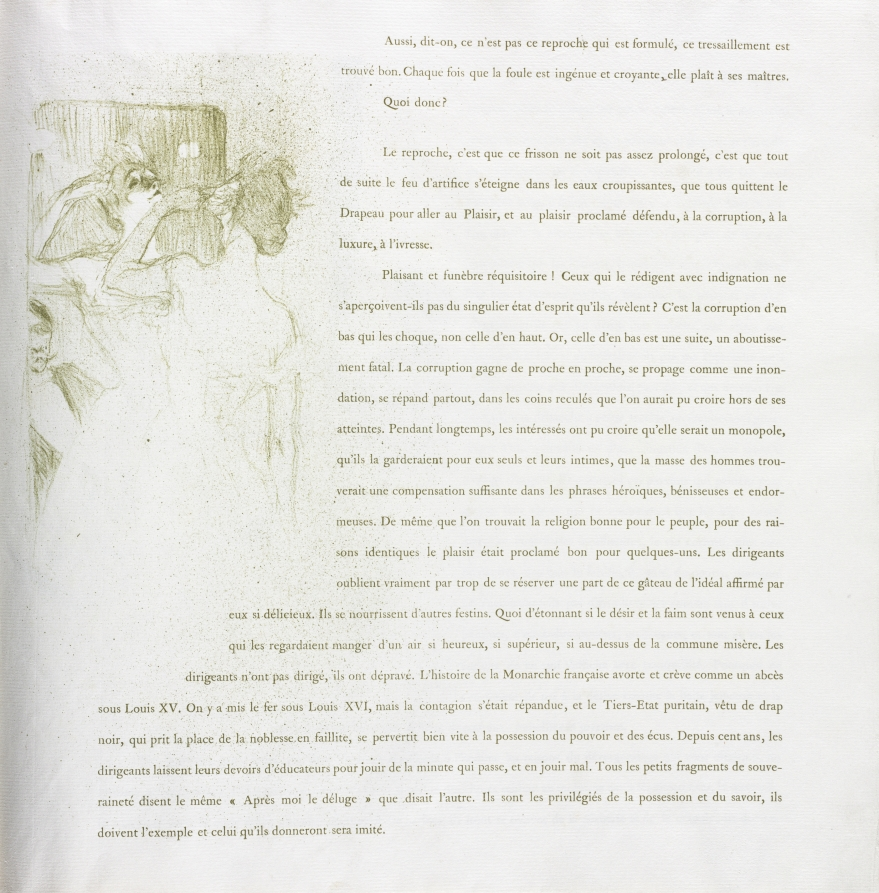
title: Yvette Guilbert-French Series: No. 13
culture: France, 19th century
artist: Henri de Toulouse-Lautrec (French, 1864–1901)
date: 1894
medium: lithograph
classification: Bound Volume